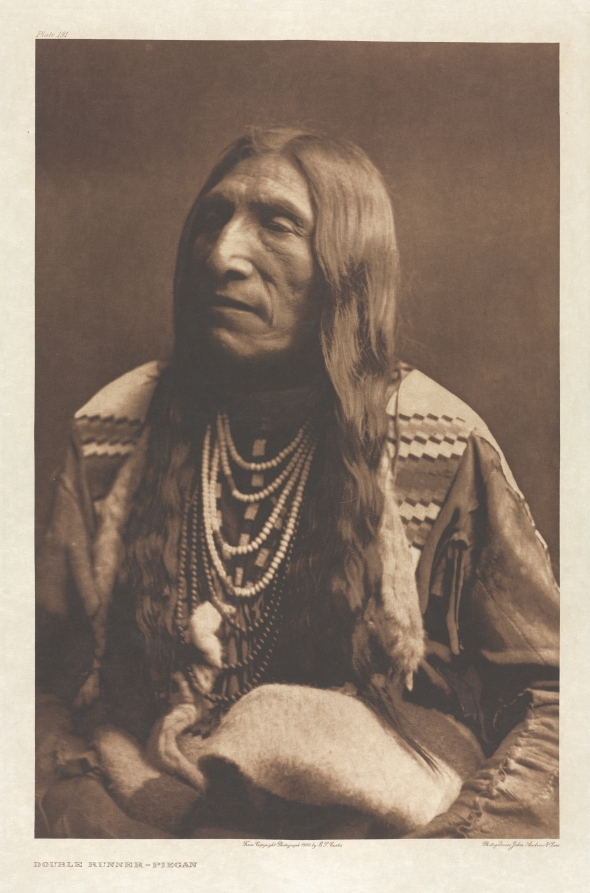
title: Portfolio VI, Plate 191: Double Runner--Piegan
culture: America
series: The North American Indian: being a series of Portfolios picturing and describing the Indians of the United States, the Dominion of Canada, and Alaska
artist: Edward S. Curtis (American, 1868–1952)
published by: The University Press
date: 1900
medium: photogravure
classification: Portfolio